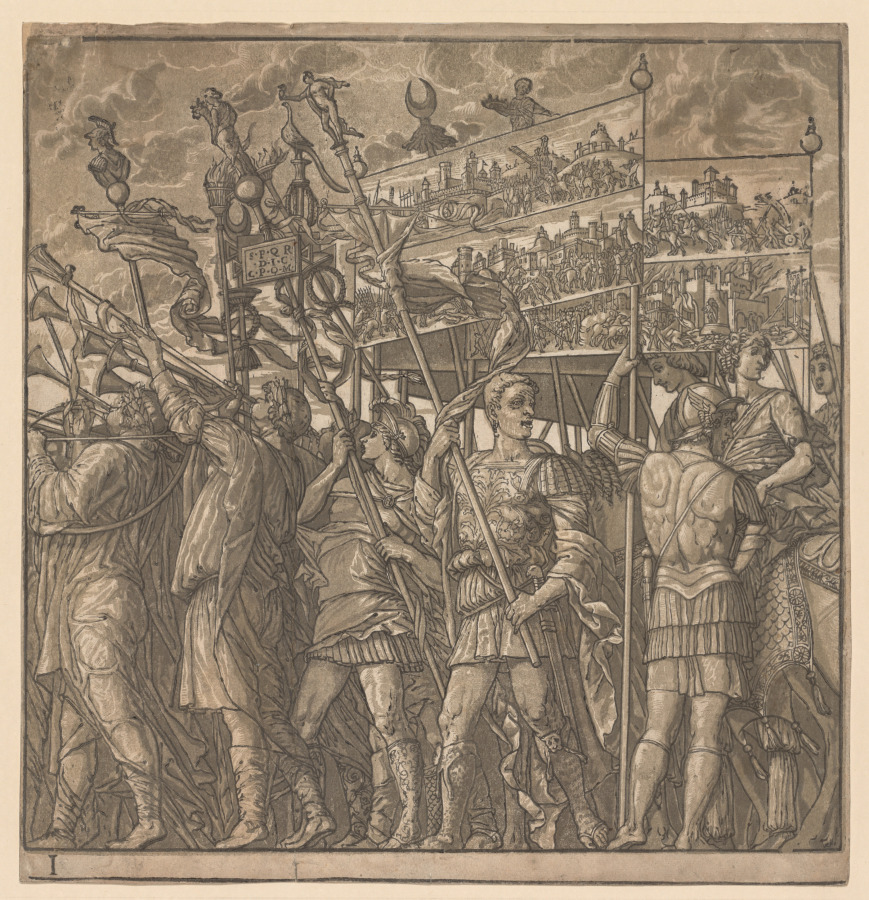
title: The Triumph of Julius Caesar: Soldiers Carrying the Pictures of War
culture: Italy, 16th century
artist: Andrea Andreani (Italian, about 1558–1610)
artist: after Andrea Mantegna (Italian, about 1431–1506)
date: 1593–99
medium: chiaroscuro woodcut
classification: Print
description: Commissioned by Duke Vincenzo Gonzaga, this series of chiaroscuro woodcuts reproduces Andrea Mantegna’s Triumph of Julius Caesar, painted a century earlier. The scenes imaginatively portray the triumphal procession of the renowned Roman general and consul Julius Caesar following his successful defeat of Gaul in 52 BC. Each section of the continuous frieze shows elements typical of these parades, sanctioned by the Roman Senate and described in ancient texts. The printed suite’s frontispiece features a portrait bust of Mantegna, and the text below boasts that the famous paintings attracted many viewers. People who owned sets of these woodcuts often tacked them up to create a decorative frieze. Andreani issued the prints with a sheet of classical columns that could be cut out and placed between the scenes. Two fragments of these columns, colored orange, still flank the fourth scene.